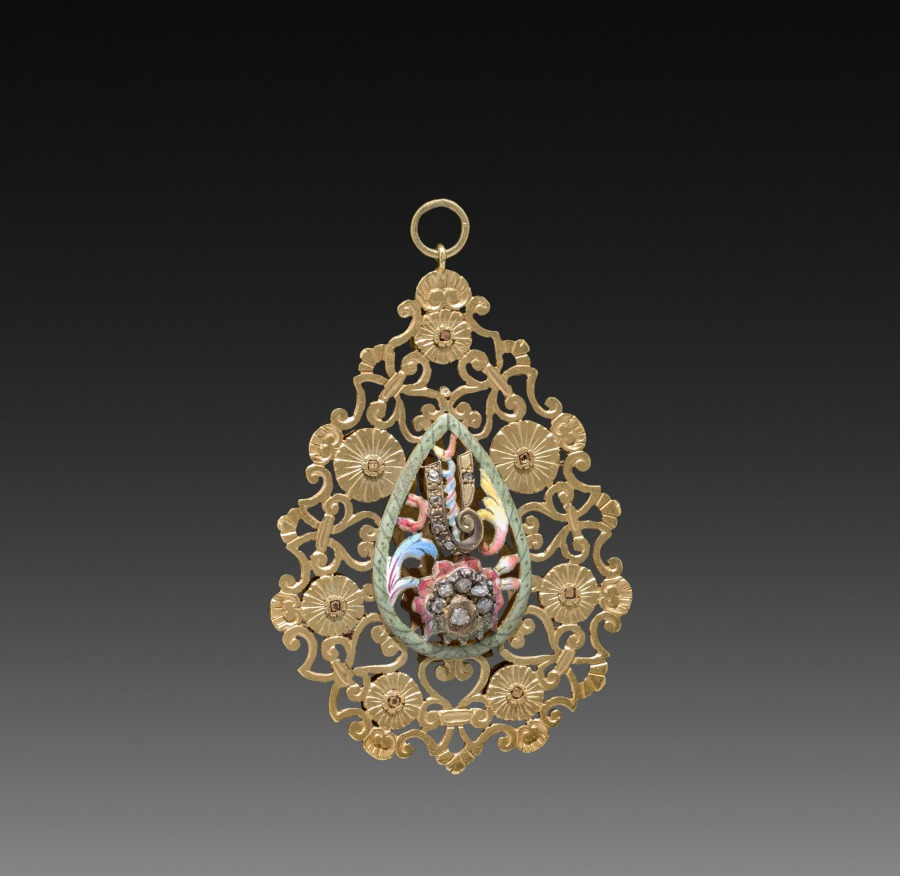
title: Pendant (part 2)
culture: Belgium, 18th century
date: 1700s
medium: silver gilt and enamel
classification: Metalwork